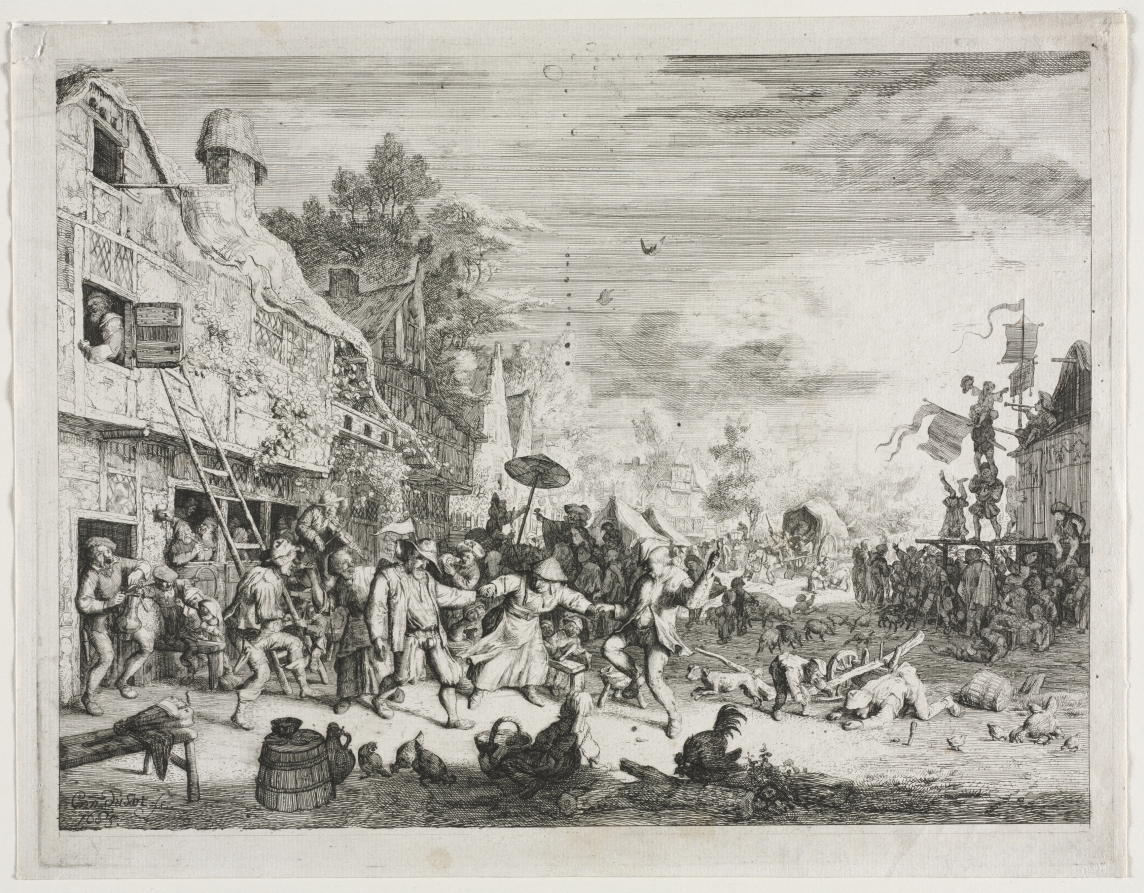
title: Village Fair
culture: Netherlands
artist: Cornelis Dusart (Dutch, 1660–1704)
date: 1685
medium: etching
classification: Print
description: Though associated with morally questionable behavior, alcohol in the Netherlands was important to long-standing traditions and vital to the economy. This tension plays out in images of village festivals, church holidays, and family events held outdoors. Compared to the orderly fair portrayed by David Teniers, this one is drunken chaos. A fiddler plays while fights break out and stumbling couples take hands to dance. Dogs, chickens, children, and a herd of pigs fill the disorderly space before a makeshift stage with spontaneous acrobatics. Fueling the frenzy is a tavern, at left, out of which a man staggers with a full pitcher.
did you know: Many rural people in the 1600s had at least one pig, dog, or both. The usefulness and flexible diets of these animals made them easy to live with.